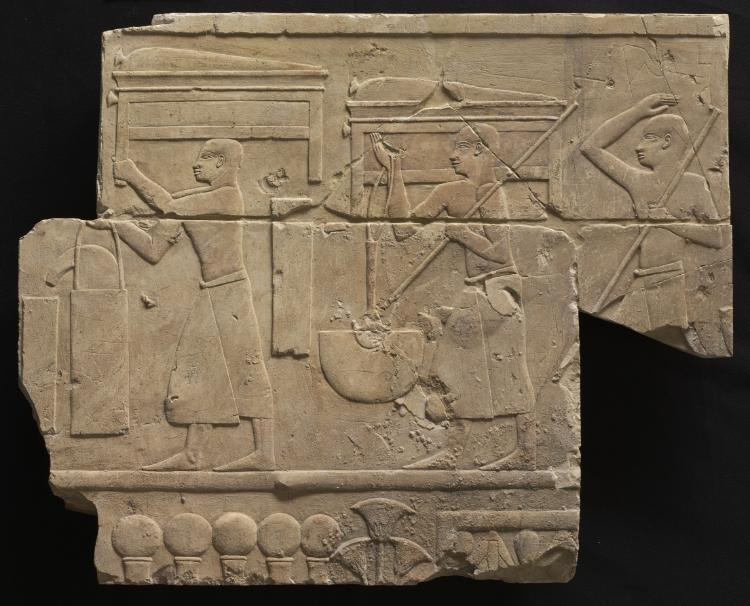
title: Men Bearing Tomb Equipment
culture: Egypt, Late period (715–332 BCE), Dynasties 25–26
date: c. 667–647 BCE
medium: limestone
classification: Sculpture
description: Servants carry chests of personal possessions and funerary equipment to the tomb. The style suggests that this relief was copied from or based on one of Dynasty 12.